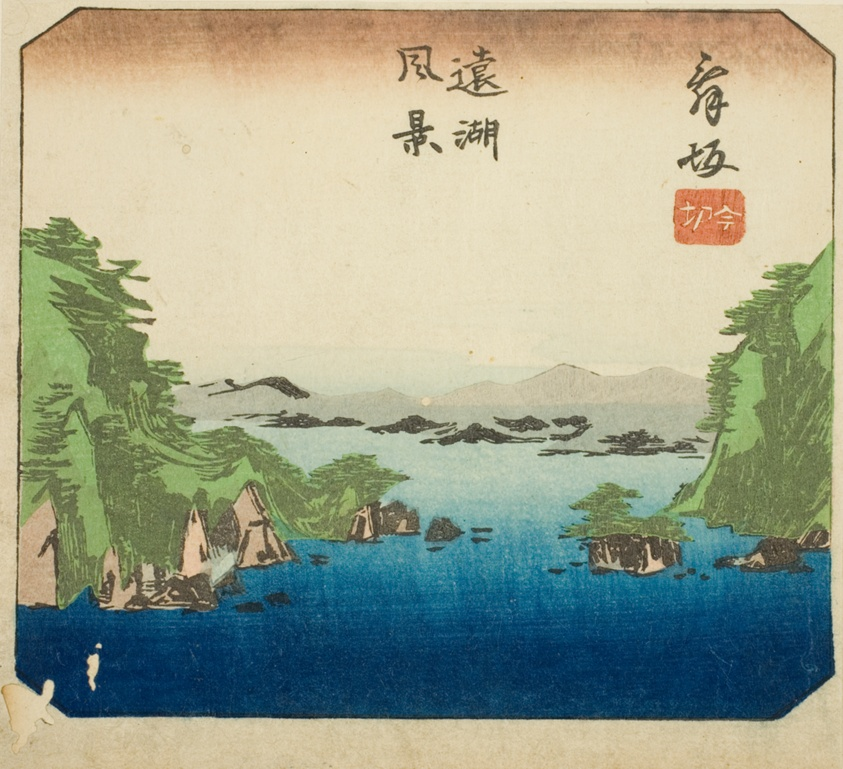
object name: Print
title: Maisaka, section of sheet no. 7 from the series "Cutout Pictures of the Tokaido Road (Tokaido harimaze zue)"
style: Japanese (culture or style)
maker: Utagawa Hiroshige 歌川 広重; Japanese, 1797-1858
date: c. 1848/52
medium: Color woodblock print; section of harimaze sheet (uncut sheet: 1939.1299)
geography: Japan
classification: woodblock print; print; asian art